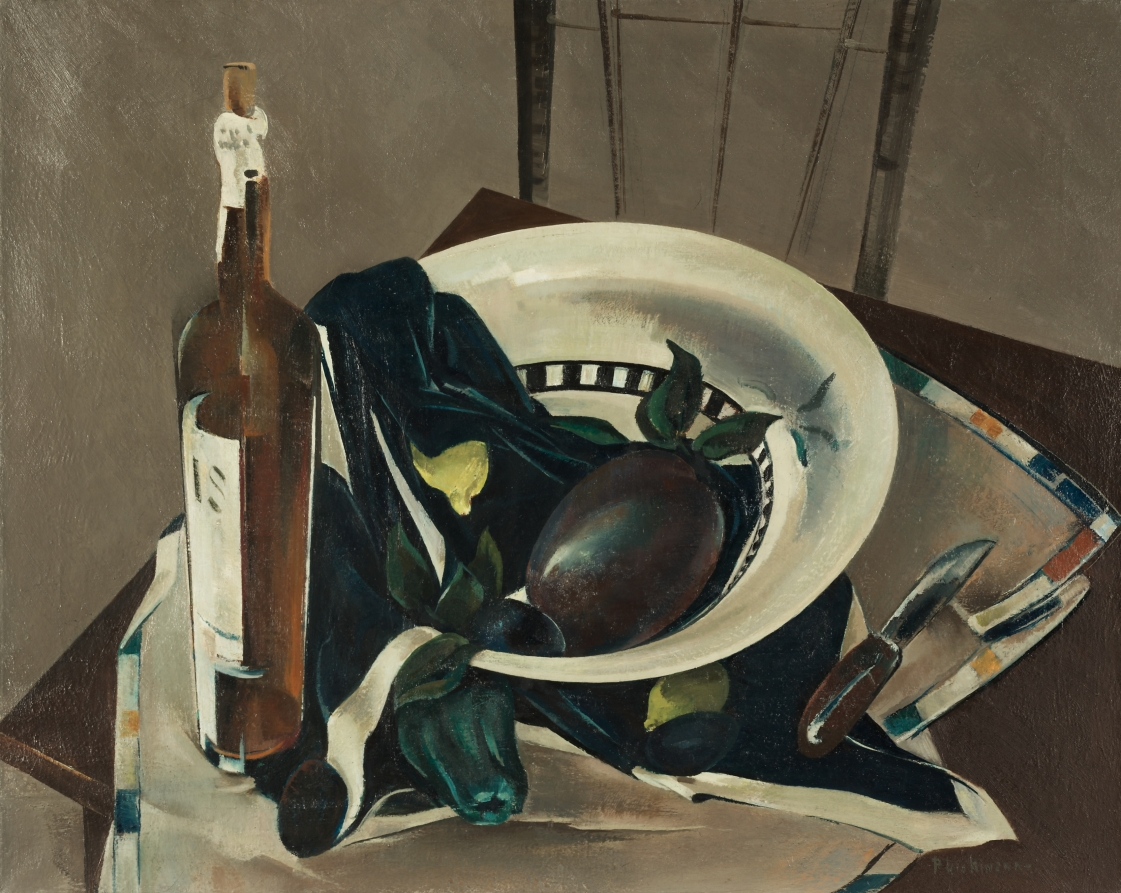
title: Still Life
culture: America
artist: Preston Dickinson (American, 1891–1930)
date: c. 1924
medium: oil on canvas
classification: Painting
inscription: signed lower right: P. Dickinson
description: Preston Dickinson’s composition presents a seemingly casual arrangement of eggplants and lemons amid a tabletop setting with a bowl, knife, and napkins. A loosely corked bottled beverage stands at left, and a lightly sketched chairback occupies an otherwise empty background.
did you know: Commonly thought to be vegetables, eggplants are technically berries.